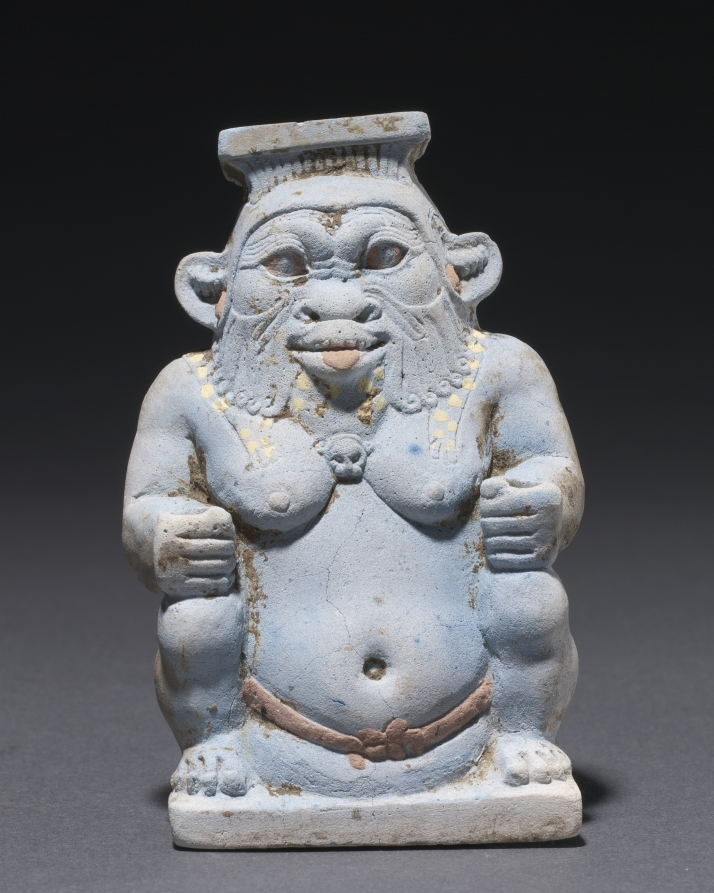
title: Cosmetic Jar in the Form of the God Bes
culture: Egypt, Late period (715–332 BCE), Dynasty 26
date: 664–525 BCE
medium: Egyptian blue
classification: Vessels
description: Both ancient Egyptian men and women loved cosmetics. Unguents, oils, and perfumes made from aromatic plant resins and gums were obtained at great cost from distant lands. The objects identified with cosmetics were given lavish treatment. The god Bes, patron god of cosmetics, is the subject of this colorful jar.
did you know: Bes was the Egyptian god of many things, including cosmetics, war, and childbirth.